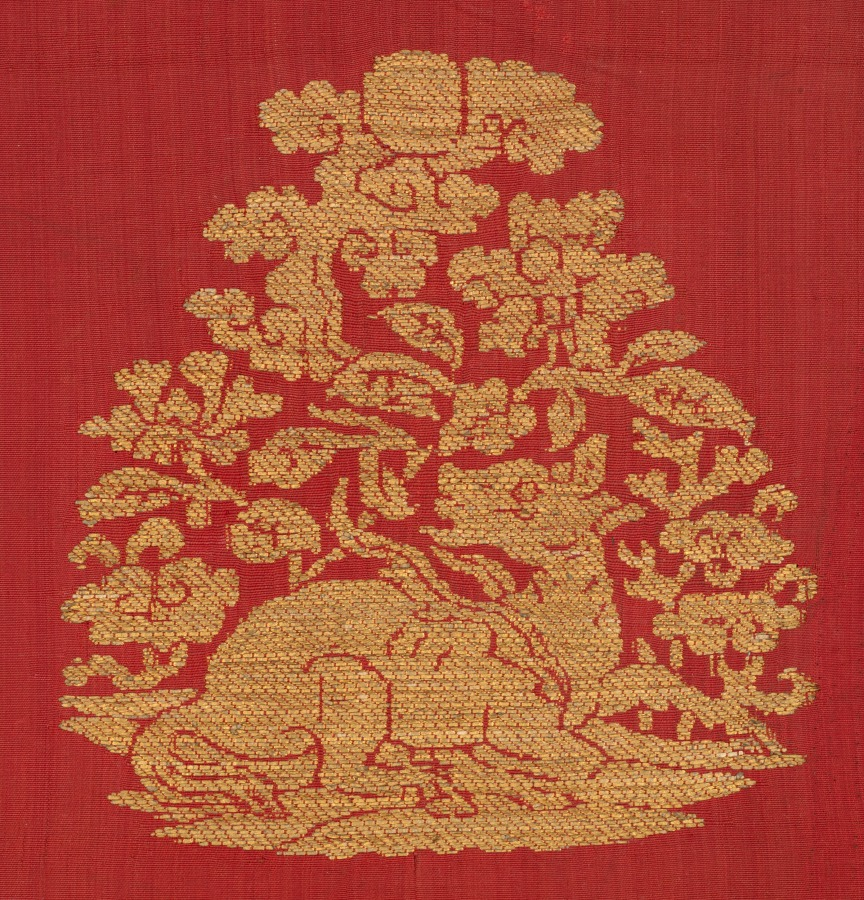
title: Brocade with Djeiran Gazing at the Moon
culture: China, Jin dynasty (1115-1234)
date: 1115–1234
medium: Silk and gold thread; tabby, brocaded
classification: Textile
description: The mysterious image of a deerlike animal gazing up at the moon among clouds has been variously interpreted over many centuries. The animal, lying down with one foreleg extended and looking back, originated as a djeiran, or Central Asian antelope. Commonly appearing on Sogdian silver from the 600s onward, the motif migrated via the trade routes to northern China. There, during the Jin and Yuan (1279–1368) dynasties, it was very popular and always depicted with the moon supported by clouds. Chinese writers often identify the djeiran as the mythical rhinoceros (xi'niu) that is said to gaze at the moon, or as the cow of Wu "panting upon seeing the moon."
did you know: The gold-brocaded pattern is repeated in staggered rows with alternating orientations.